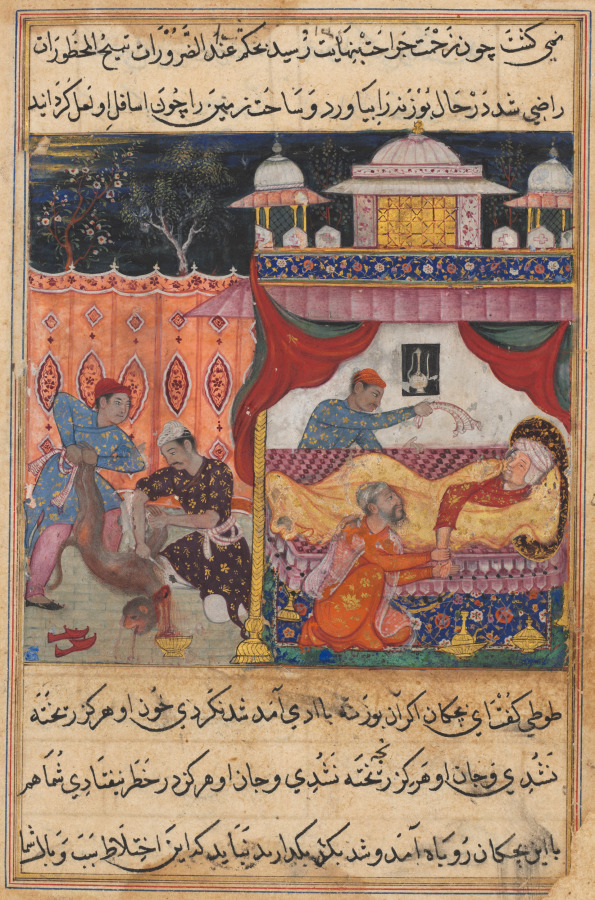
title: The monkey slain, his blood to be used as medicine for the ailing prince he has bitten, from a Tuti-nama (Tales of a Parrot): Fifth Night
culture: Mughal India, court of Akbar (reigned 1556–1605)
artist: Basawan​ (Indian, active mid-1500s)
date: c. 1560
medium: gum tempera, ink, and gold on paper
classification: Painting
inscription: 'amal basāwan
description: Wounded by the chess-playing monkey’s bite, the prince’s hand became increasingly infected. The only cure, his doctors said, was to apply the blood of the monkey to the wound and let it dry. Reluctantly, the prince allowed the monkey to be killed. Two men accomplish this serious work at the left. In the right margin is written the name of the artist, the celebrated Basavana. The Tuti-nama contains the earliest known paintings by the prolific master who was instrumental in shaping the Mughal painting style over subsequent decades.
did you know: Under the covers is the hand that got infected from the monkey bite.